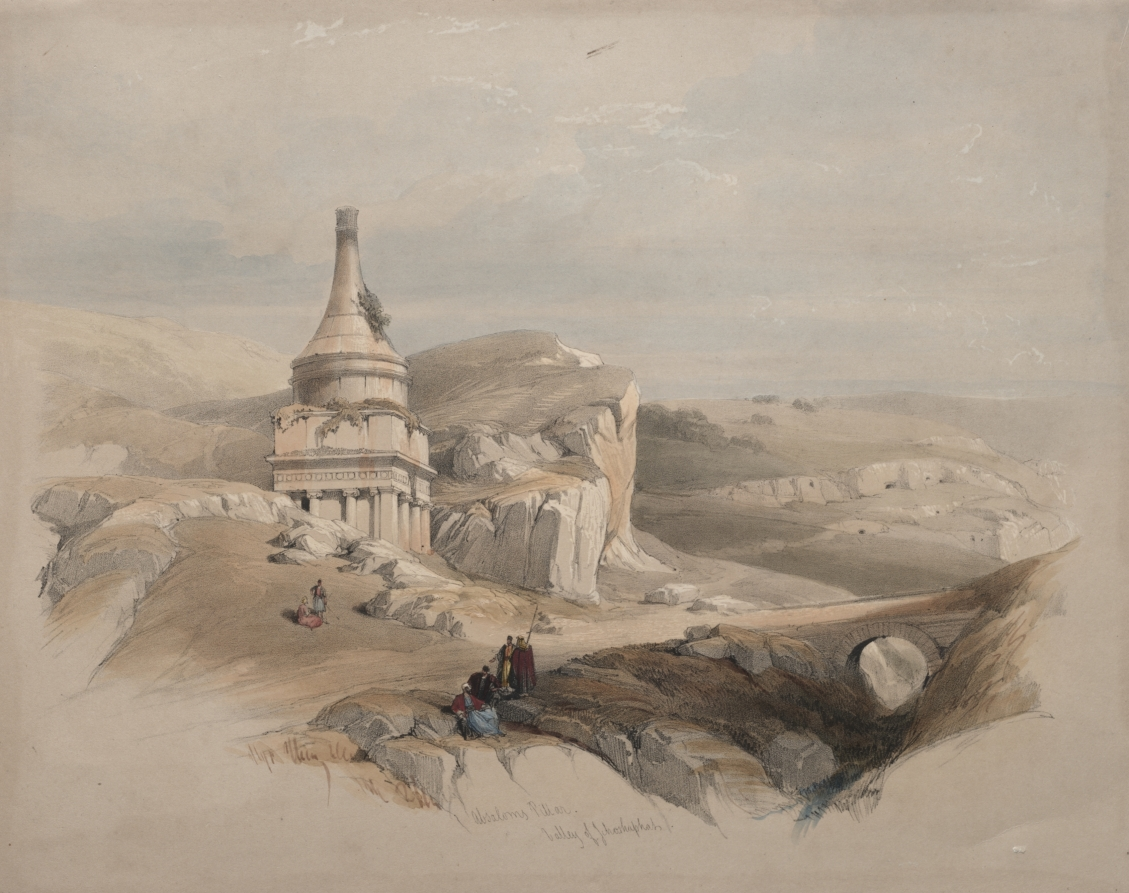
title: Absalom's Pillar, Valley of Jehoshaphat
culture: England, 19th century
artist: David Roberts (Scottish, 1796–1864)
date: 1839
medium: color lithograph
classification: Print